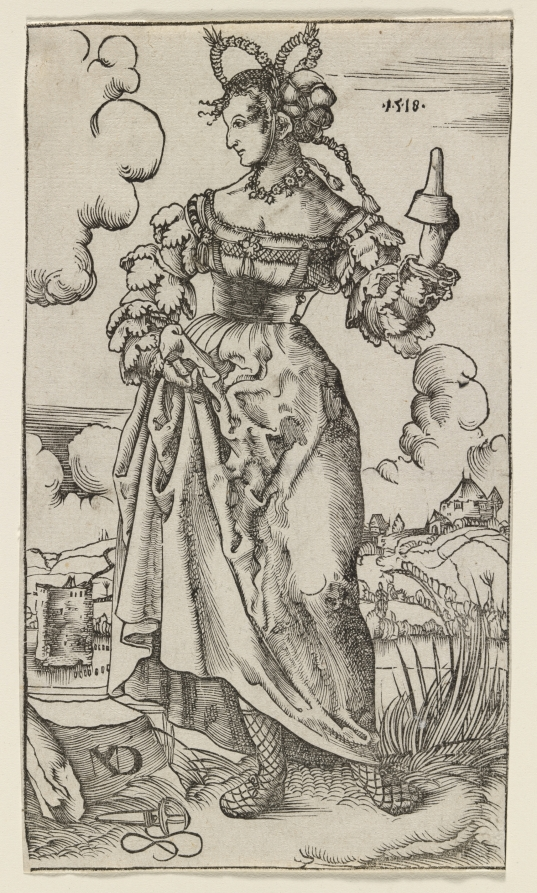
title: The Wise and Foolish Virgins: The Fifth Foolish Virgin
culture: Switzerland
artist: Nikolaus Manuel Deutsch (Swiss, c. 1484–1530)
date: 1518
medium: woodcut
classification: Print